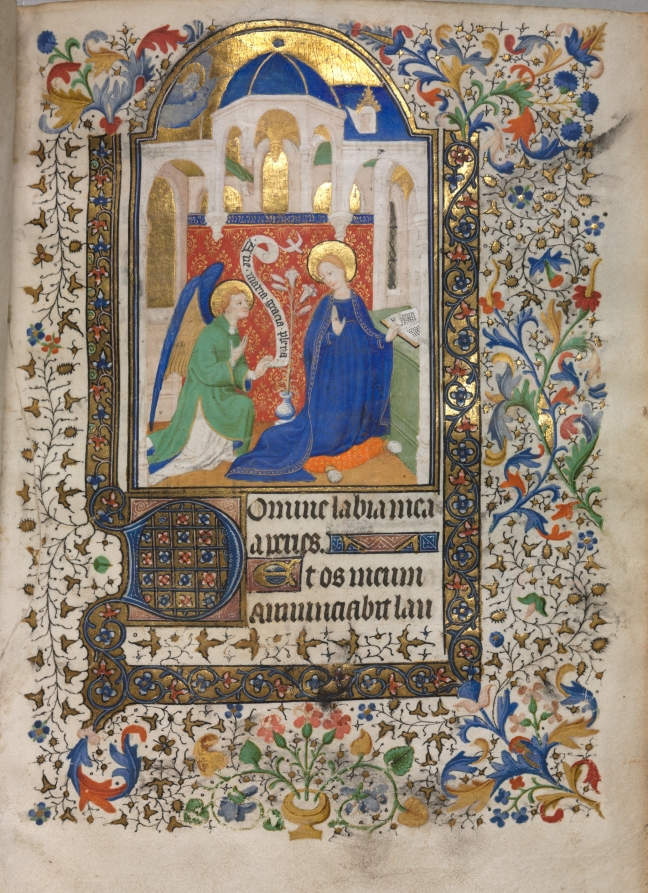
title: Book of Hours (Use of Paris): Annunciation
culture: France, Paris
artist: follower of Boucicaut Master (French, Paris, active about 1410–25)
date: c. 1420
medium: ink, tempera, and gold on vellum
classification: Bound Volume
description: The Guise Master-named after the book of hours he illustrated for François de Lorraine, Duke of Guise-developed his style from the more dominant Parisian workshop of the Boucicaut Master.